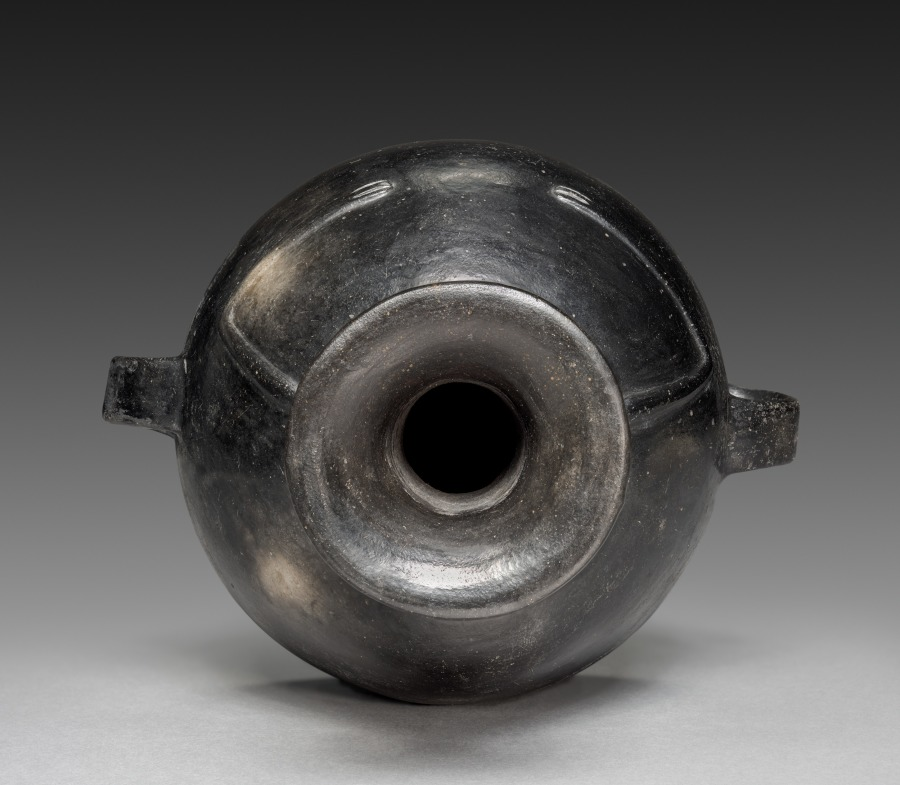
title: Hunchback Vessel (Aryballos)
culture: Central Andes (Peru), Chimú-Inka style, Late Horizon period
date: 1470–1521 (Thermoluminescence date, 1315–1615)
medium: ceramic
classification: Ceramic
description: This handsome vessel, along with the nearby double-chambered vessel, were made on the north coast after the Inka conquered the Chimú in the 1460s. Under Inka rule, many aspects of Chimú ceramic technology continued but new forms and subjects were introduced, such as the aryballos, a classic Inka vessel type. This example takes the form of a hunchback and may refer to the Inka predilection for employing hunchbacks as royal servants.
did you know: Hunchbacks seem to have functioned as servants in Inka royal palaces.